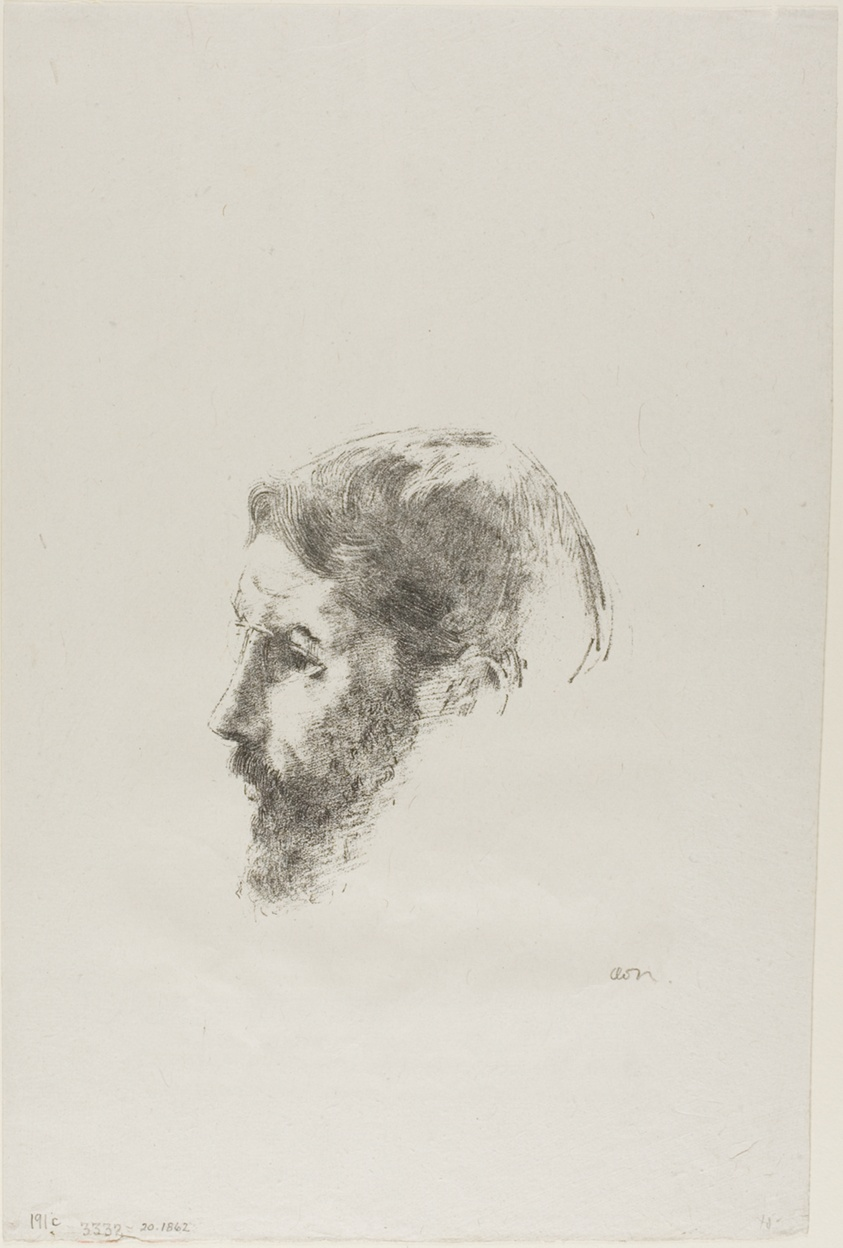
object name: Print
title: Pierre Bonnard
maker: Odilon Redon (French, 1840-1916)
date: 1902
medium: Lithograph in black on light gray chine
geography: France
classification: lithograph; print; prints and drawing; paper